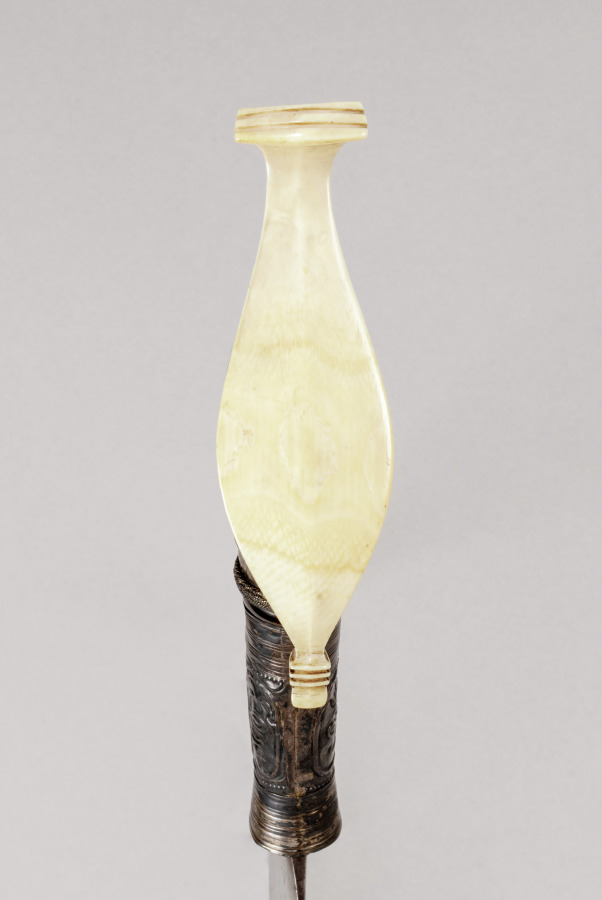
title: Sword (Barong)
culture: Philippines, Mindanao, Sulu Archipelago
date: before 1916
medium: Blade: metal; handle: metal with silver foil and repoussé work; pommel: ivory and carabao horn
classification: Arms and Armor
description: This sword has a broad, leaf-shaped blade characteristic of the Sulu Archipelago. Its profile suggests it was used for powerful cut-and-slash fighting. The hilt terminates in an exceptionally long ivory cockatoo (kakatua) pommel, carved with delicate okir scrollwork. This was an object of authority, status, and ceremonial presence within Tausug culture, probably owned by a member of the datu ruling class.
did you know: The ovular shape on the ivory pommel’s base marks where the nerve of the tooth was.